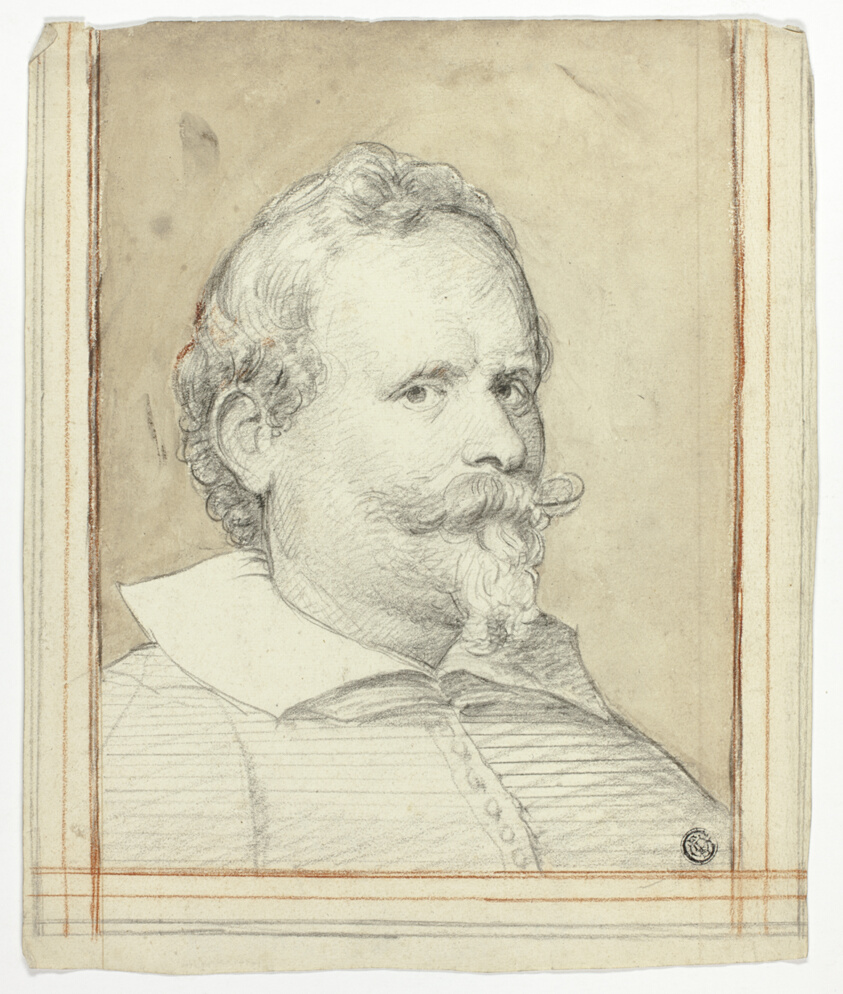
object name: Drawing and Watercolor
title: Cornelis de Vos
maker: After Anthony van Dyck; Flemish, 1599-1641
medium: Black chalk, with brush and pale brown wash, heightened with touches of red chalk, on ivory laid paper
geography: Flanders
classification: chalk; drawings (visual works); prints and drawing